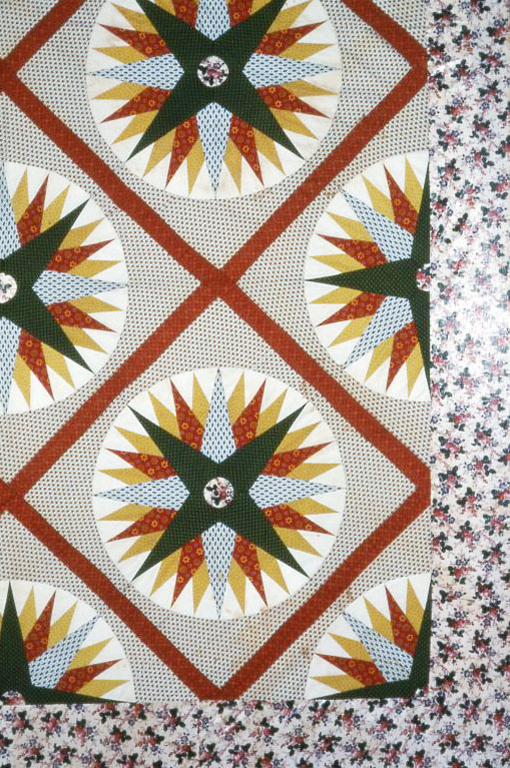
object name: Textile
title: Bedcover (Unfinished Mariner's Compass Quilt)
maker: United States, Pennsylvania, Philadelphia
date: 1845/55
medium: Cotton, plain weave; some printed; some glazed; pieced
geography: Pennsylvania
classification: needlework - quilt; textile